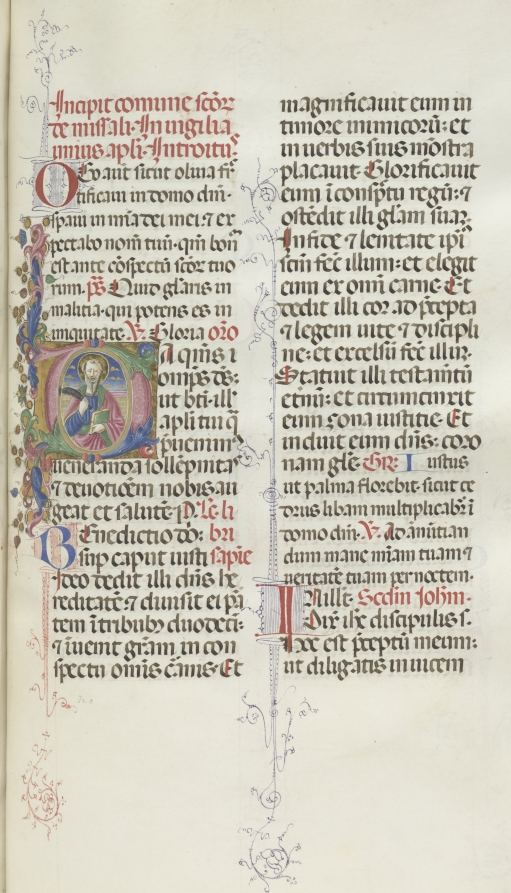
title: Missale: Fol. 327: Saint Bartholomew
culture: Italy, Perugia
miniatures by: Bartolommeo Caporali (Italian, c. 1420–1503)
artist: assisted by Giapeco Caporali (Italian, d. 1478)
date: 1469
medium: ink, tempera and burnished gold on vellum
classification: Bound Volume